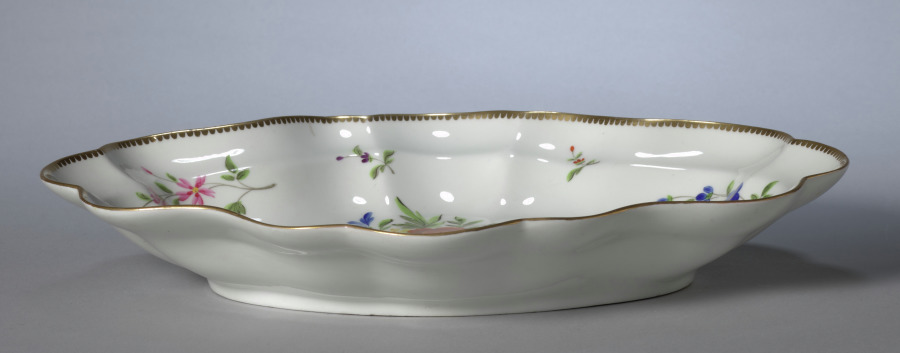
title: Dish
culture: England, 19th century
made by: Worcester Porcelain Factory (British, established 1751)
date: 1820–1840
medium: porcelain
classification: Ceramic